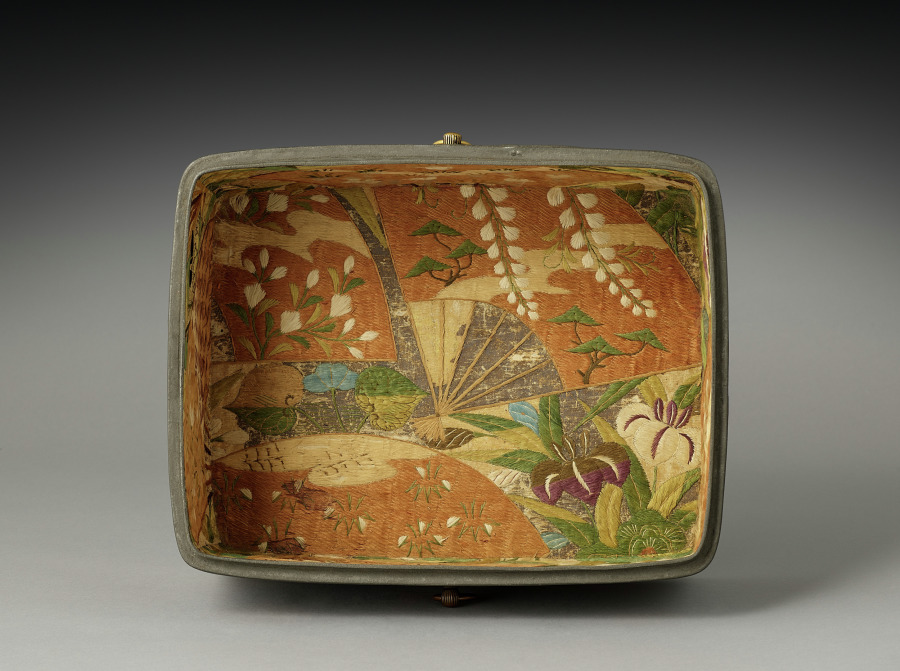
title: Cosmetics Box with Chrysanthemums (base)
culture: Japan, Kamakura period (1185–1333)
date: early 1300s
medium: lacquer on wood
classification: Lacquer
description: In China, the chrysanthemum was historically appreciated for its association with the Double Nine Festival and the reclusive life of the poet Tao Yuanming (AD 365-427). In Japan, the 16-petaled chrysanthemum came to symbolize the Japanese imperial family after Emperor Gotoba (1180-1239) chose the motif as his personal emblem, having it applied to his sword and everyday utensils. This box proves that the flower also appeared on lacquer wares as early as the Kamakura period.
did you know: In Japanese, this type of small box is called a tebako, literally a hand box, and was typically part of a cosmetics set.